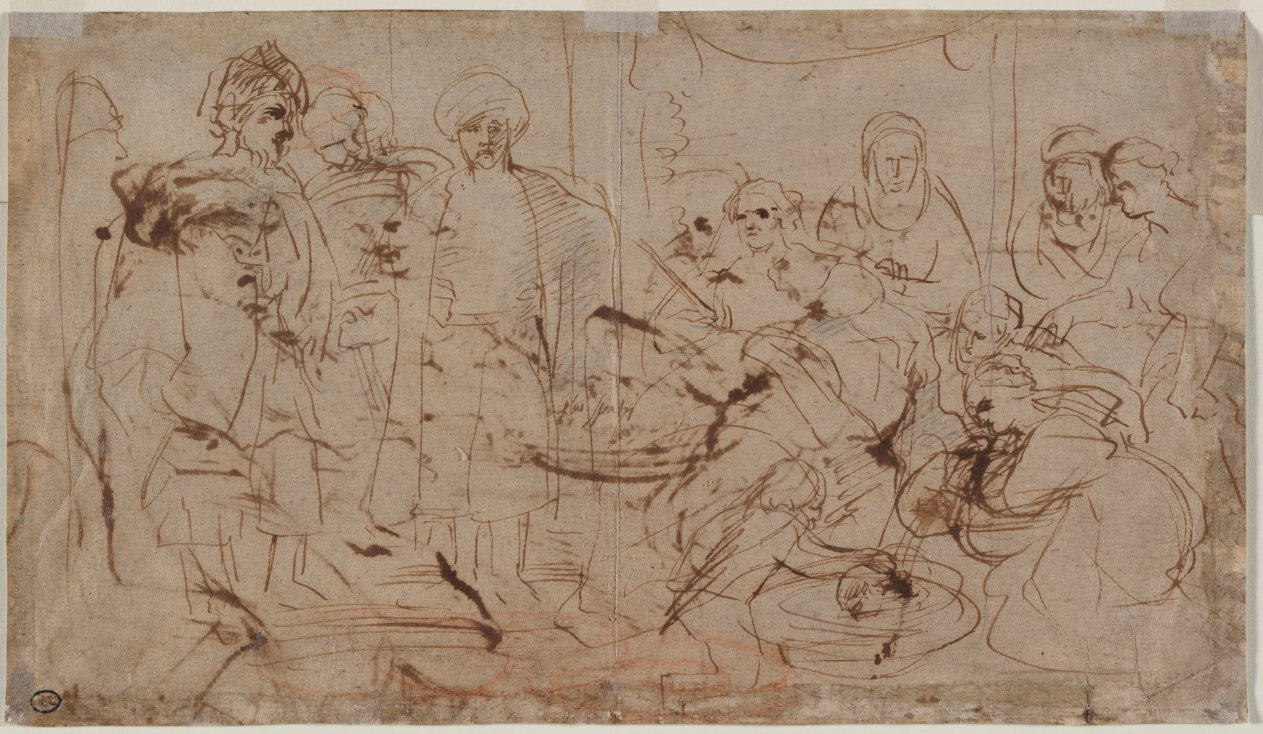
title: Tomyris with the Head of Cyrus (verso)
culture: Flanders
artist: Peter Paul Rubens (Flemish, 1577–1640)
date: c. 1637–38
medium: pen and brown ink, with black and red chalk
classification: Drawing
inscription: by artist, center, in brown ink: plus spatij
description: Peter Paul Rubens had a large studio in Antwerp and used drawing to prepare for large paintings as well as to direct the many pupils who assisted him. Striking in its immediacy, the drawing on the recto of this sheet of paper is a preparatory study for the Feast of Herod painting now at the Scottish National Gallery in Edinburgh. Herod, wearing a large cap and wrapped in a mantle, shrinks back in horror as Salome uncovers a charger that holds the head of Saint John the Baptist. Smiling, Herodias grabs the platter with her left hand and, in a chilling detail, gestures toward the charger with a fork. Rubens wrote what is usually interpreted as “Herodias somewhat higher” at the top of the sheet. The verso of the sheet depicts a sketch for another story featuring a change of fortune at the hands of a vengeful woman, Tomyris with the Head of Cyrus. Rubens made two paintings of the subject (now in Paris and Boston). A rare theme, the story tells of Queen Tomyris who, avenging the death of her son in battle, collects the head of his murderer Cyrus in a bag of human blood. Tomyris is shown seated under a canopy holding a scepter, while the servants before her handle Cyrus’s head. Rubens wrote “plus spatij” (more space) in the center of the sheet.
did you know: The two stories that Rubens depicted on the front and back of this sheet of paper each feature a gruesome death, the result of revenge at the hands of a powerful woman.